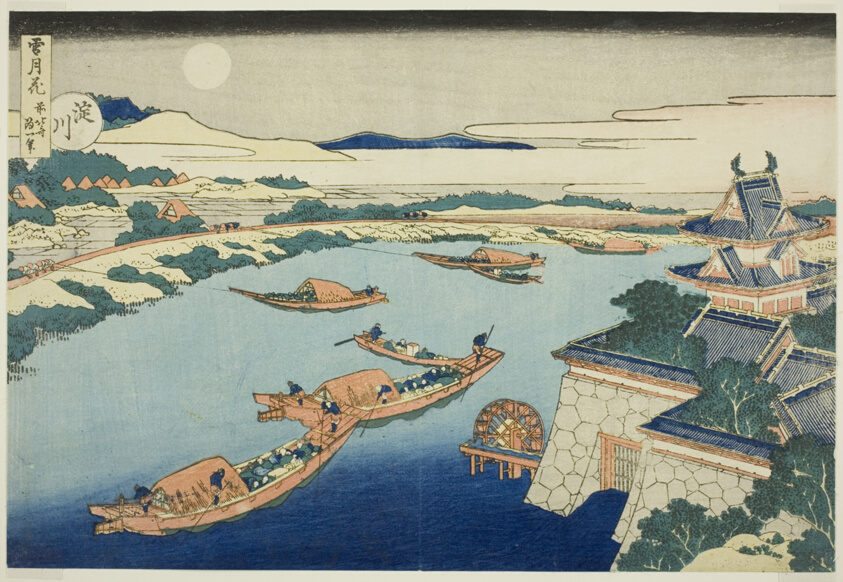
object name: Print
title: Moonlight on the Yodo River (Yodogawa), from the series "Snow, Moon and Flowers (Setsugekka)"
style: Japanese (culture or style)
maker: Katsushika Hokusai 葛飾 北斎; Japanese, 1760–1849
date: c. 1833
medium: Color woodblock print; oban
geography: Japan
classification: woodblock print; print; asian art